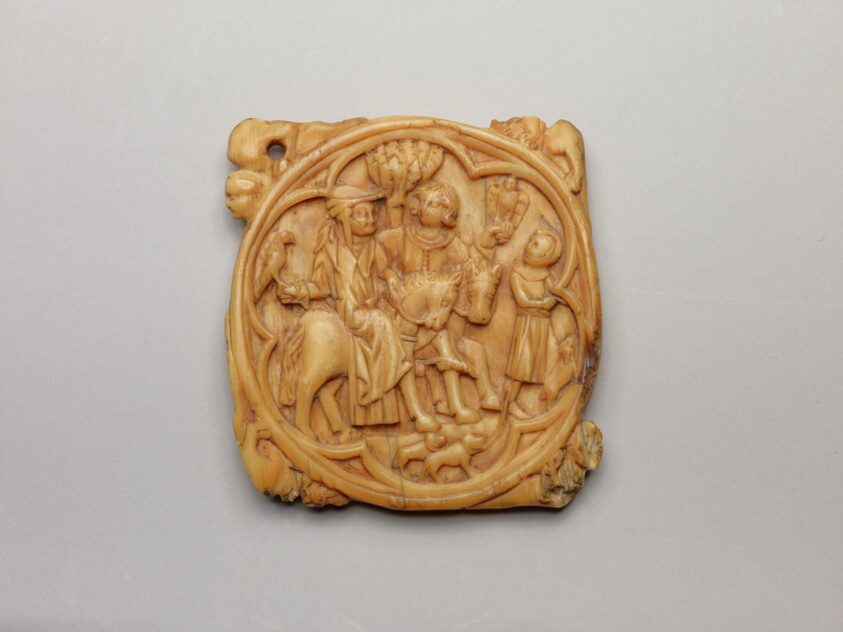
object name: Decorative Arts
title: Mirror Case with Falconry Scene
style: 14th century, medieval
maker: French, Paris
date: 1325–50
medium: Ivory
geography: Paris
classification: functional object; sculpture; decorative arts; french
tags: dogs, animals, birds, falcons, horse, men